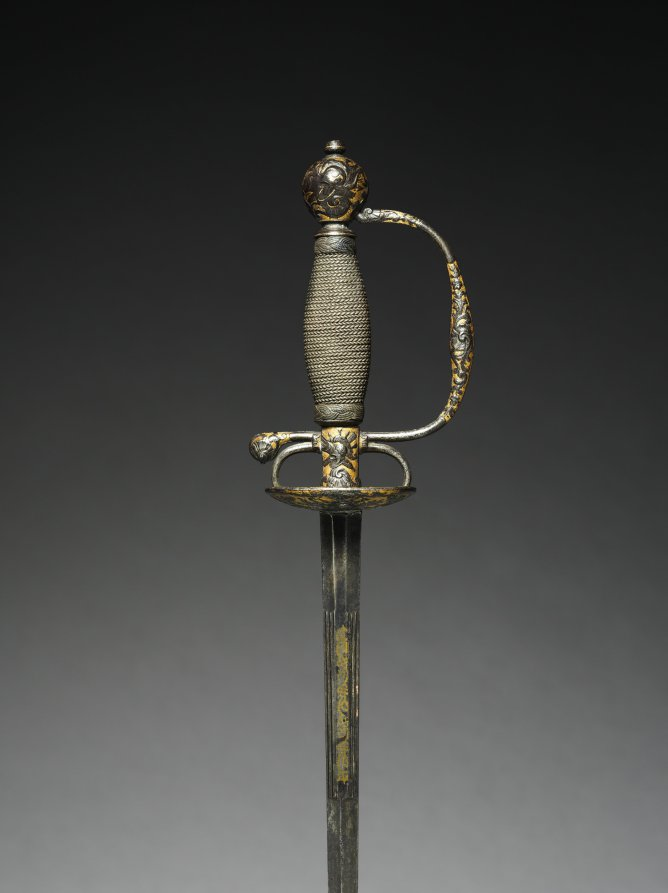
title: Child's Sword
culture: France, Paris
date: c 1780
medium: stainless steel, silver and brass wire inlay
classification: Arms and Armor